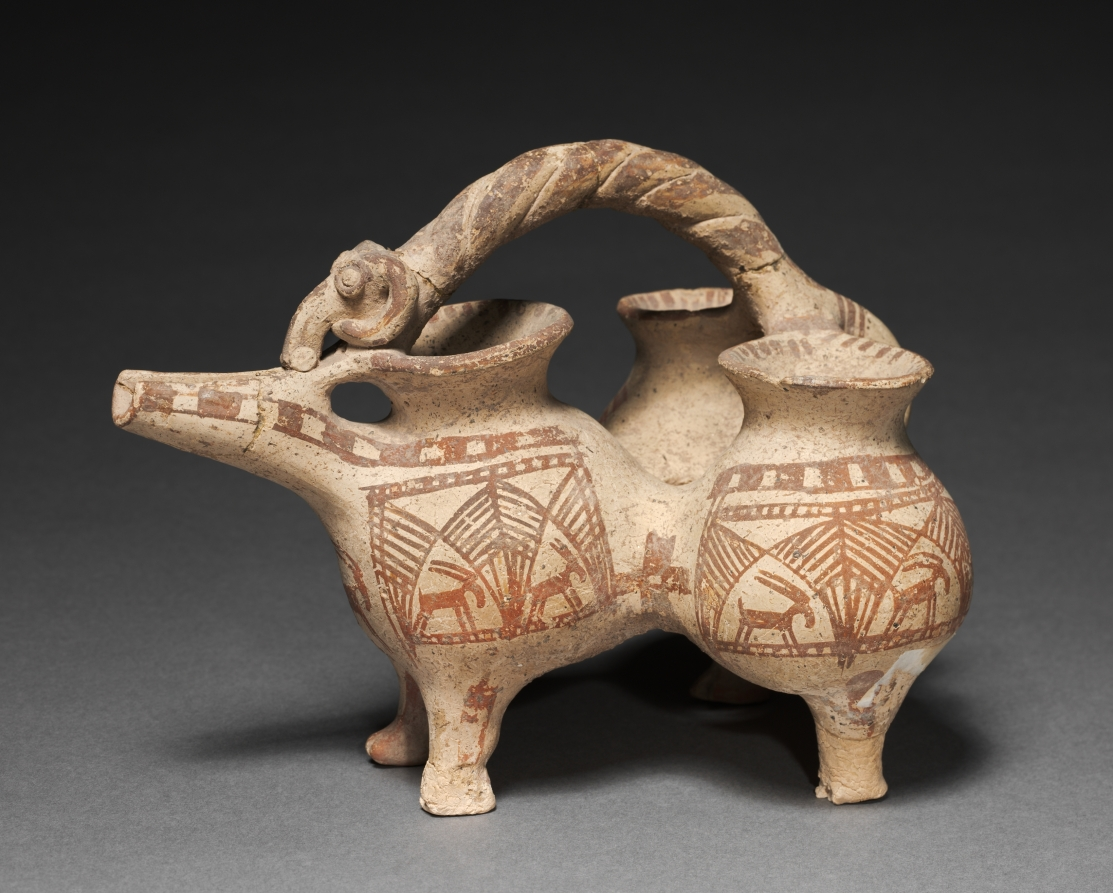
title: Three-Part Pitcher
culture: Iran, Luristan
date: c. 800–700 BCE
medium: earthenware, unglazed slip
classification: Ceramic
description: This unusual tripartite pitcher is made of three jugs joined together, a twisted handle, and a ram’s head atop a spout. Four feet connect to the pitchers, adding stability and an animal-like form. Ibexes, diamonds, and crosses, all painted in red slip, decorate the clay surface. This work is likely Baba Jan III ware from the Iron Age site Baba Jan in northwestern Iran. The pitcher is functional but may have served a ritual purpose.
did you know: The ram’s head was created separately before being attached to the spout.